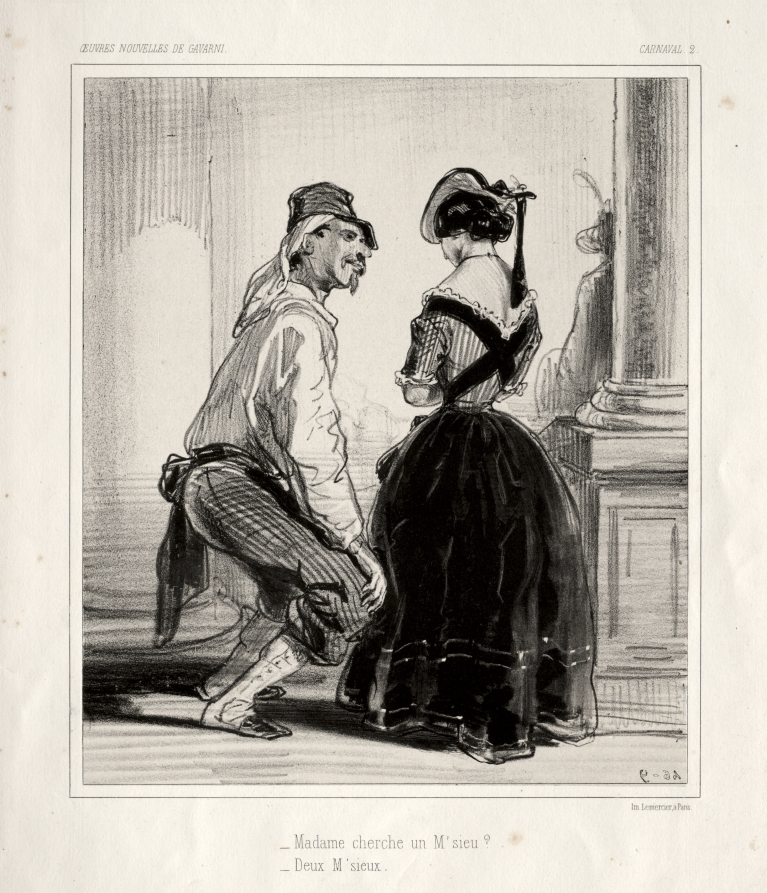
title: Carnaval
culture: France, 19th century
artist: Paul Gavarni (French, 1804–1866)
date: c. 1841–47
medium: lithograph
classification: Print